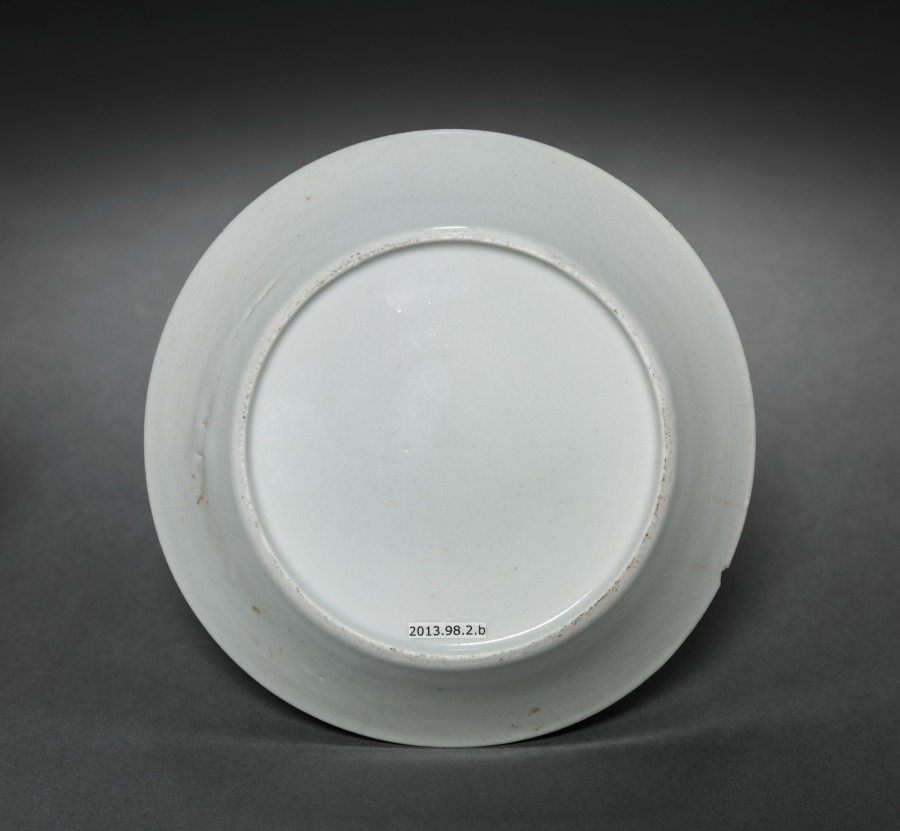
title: Saucer from Oliver Wolcott, Jr. Tea Service (2 of 6)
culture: Chinese Export porcelain, late 18th-early 19th century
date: 1785–1805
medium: porcelain, sepia enamel, gold leaf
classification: Ceramic